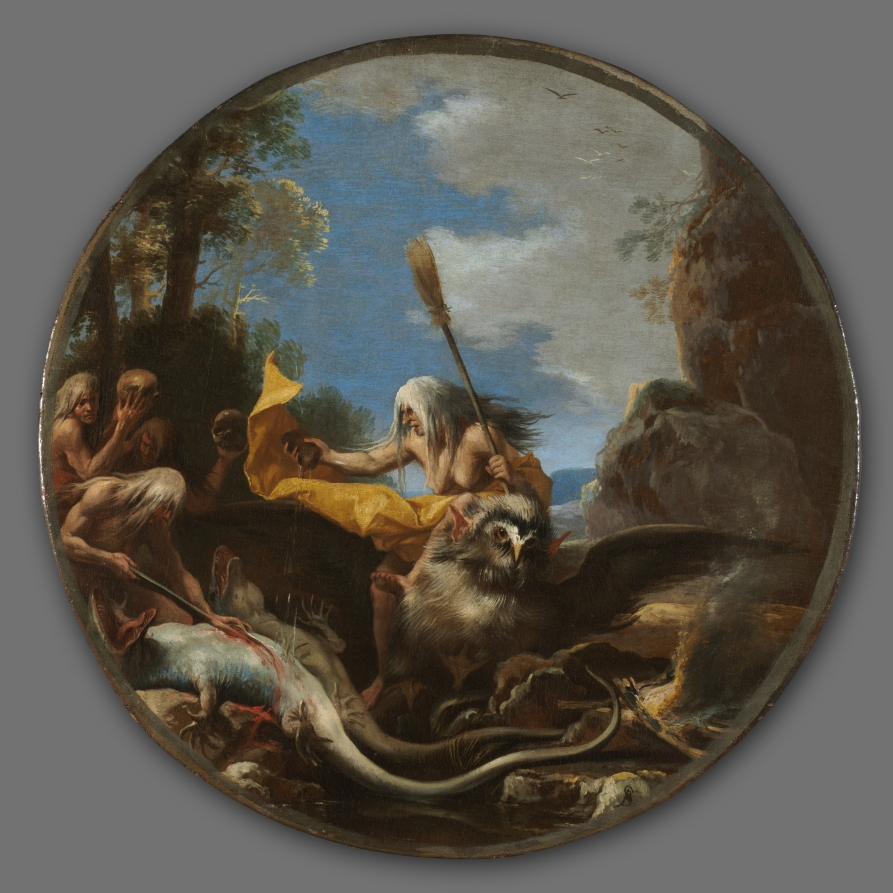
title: Scenes of Witchcraft: Day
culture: Italy, 17th century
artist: Salvator Rosa (Italian, 1615–1673)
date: c. 1645–1649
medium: oil on canvas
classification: Painting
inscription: Signed: "SR [monogram]"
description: Rosa's scene at noon showcases several hoary hags that exemplify his treatment of witches. Clutching skulls, wielding brooms, and slicing lizards, the witches prepare to travel to the Sabbath, an orgy of witches. One witch flays the skin of a thrashing lizard to extract the innards needed to concoct magical unguents, while her companions brandish skulls. Goats were the common mode of transportation for witches, but Rosa substitutes an owl, a harbinger of evil. Although Rosa foregrounds the violent cruelty of witchcraft, situating the grotesque hags in the full light of day introduces a comic aspect to the scene. Rosa's use of comedy and the unexpected to critique the world around him stemmed from the satirical poetry he wrote throughout his stay in Florence and his return to Rome in 1649. By lightening the palette and mood of the painting, Day reflects his interest in satire and his self-appointed role to expose and critique human folly.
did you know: The artist chose the painting's shape to reference the foundational role of the circle in practicing magic.